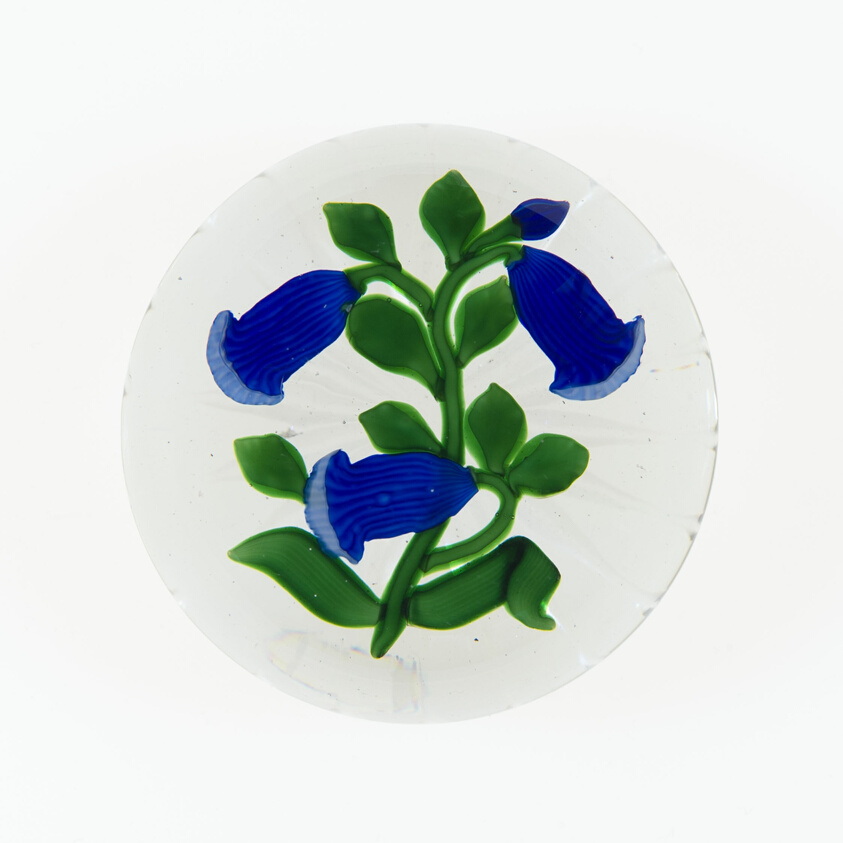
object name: Glass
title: Paperweight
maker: Baccarat Glassworks (Cristalleries de Baccarat); Lorraine, France, founded 1764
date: c. 1848–55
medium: Glass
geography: Baccarat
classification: paperweight; glass